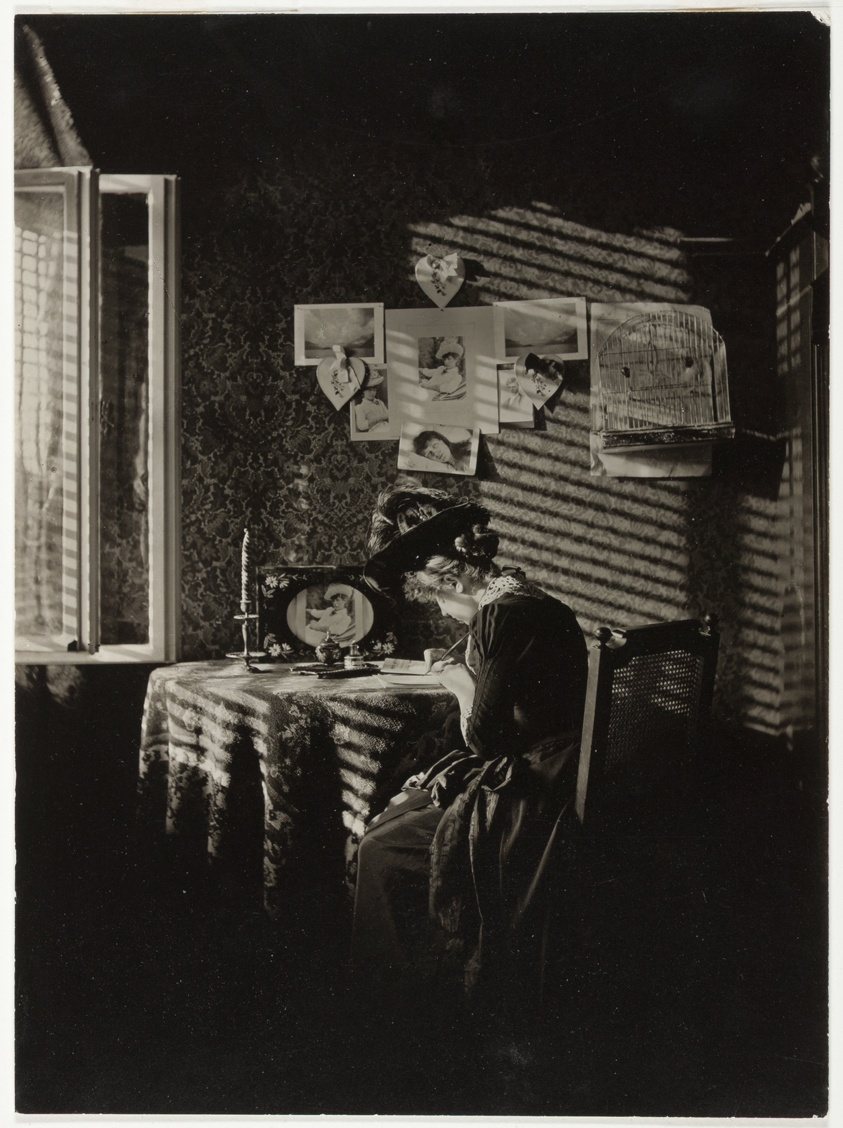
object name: Photograph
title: Sun Rays—Paula, Berlin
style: Pictorialism, 19th century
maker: Alfred Stieglitz (American, 1864–1946)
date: 1889, printed 1920/39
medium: Gelatin silver print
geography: United States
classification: gelatin silver (developing-out-paper) pr; photographic process; photography; photograph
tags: portraits, photography